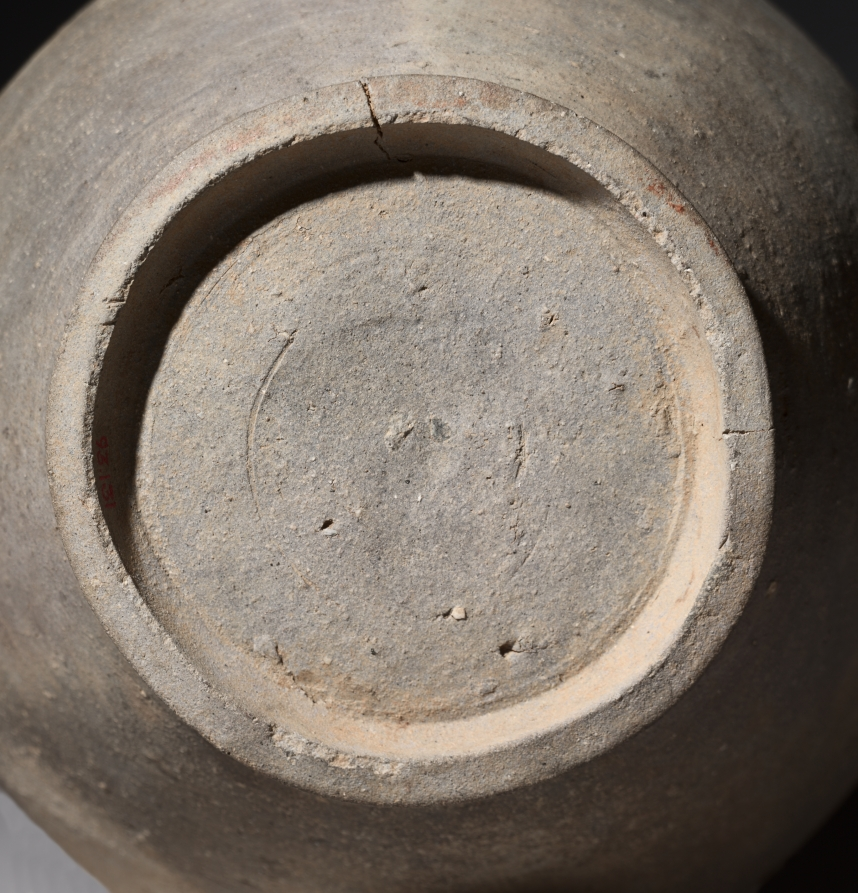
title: Cinerary Urn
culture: Japan, Heian period (794–1185)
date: c. 800–850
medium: stoneware with slight natural ash glaze (Sue ware)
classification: Ceramic